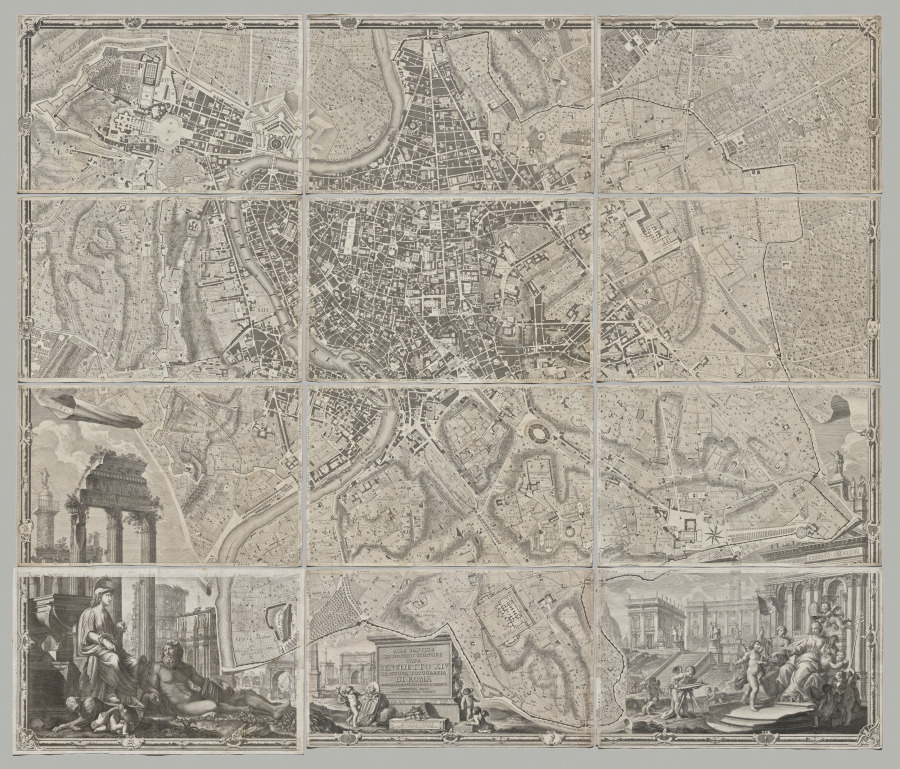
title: Nuova pianta di Roma data in luce da Giambattista Nolli l’anno MDCCXLVII, known as La Pianta Grande di Roma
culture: Italy, 18th century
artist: Giovanni Battista Nolli (Italian, 1701–1756)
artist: Carlo Nolli (Italian, 1690–1790)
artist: Rocco Pozzi (Italian, 1701–1774)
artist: Pietro Campana de Soriano (Italian, 1725–c. 1779)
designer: Stefano Pozzi (Italian, 1699–1768)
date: 1748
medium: 12 sheets with 4 index sheets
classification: Print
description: The monumental Pianta Grande di Roma, or Large Plan of Rome, which measures about 5 x 7 feet when its twelve plates are assembled, is a landmark in both cartography and printmaking. The map is considered the first scientific rendering of Rome, establishing new standards of accuracy and thoroughness when it was published in 1748. Devised by the Lombard architect and surveyor Giovanni Battista Nolli (Italian, 1701-56), the creation of the map required over ten years of surveying the city carried out by Nolli and a team of assistants with the help of new measuring devices. In Nolli’s “ichnographic” (also called “ground”) plan, architectural features and the urban infrastructure are reduced to a single horizontal slice, a minutely detailed footprint that conveys dimensions, proportions, and orientations to scale with the utmost clarity.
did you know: To make this map, Pope Clement XII granted the mapmaker permission to measure courtyards and other interior, inaccessible spaces in monastic communities, even those in nuns’ convents, which was controversial at the time.